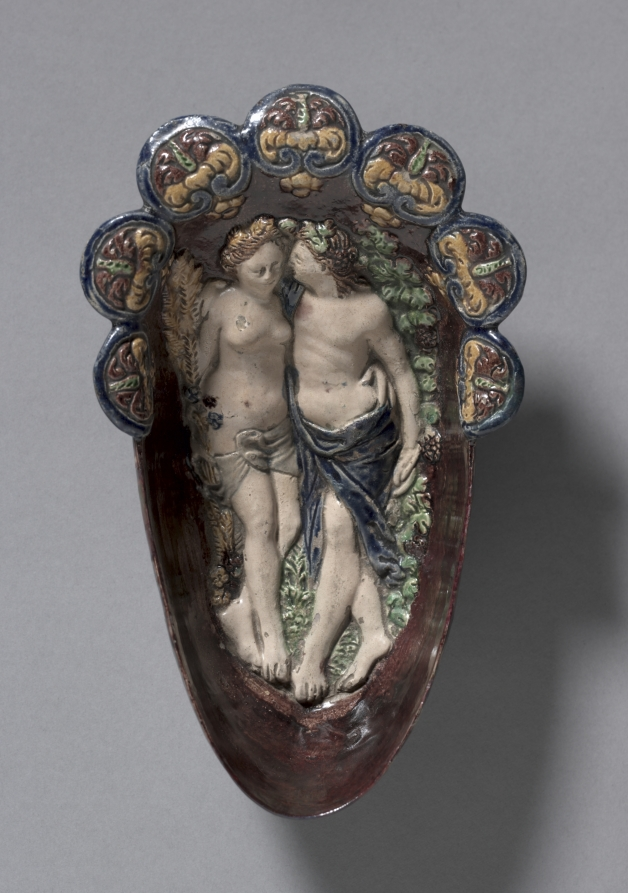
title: Boat-Shaped Cup with Ceres and Bacchus on a Bed of Grape Clusters and Wheat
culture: France, 16th century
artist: school of Bernard Palissy (French, 1510–1589)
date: late 1500s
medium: earthenware with lead glazes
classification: Ceramic